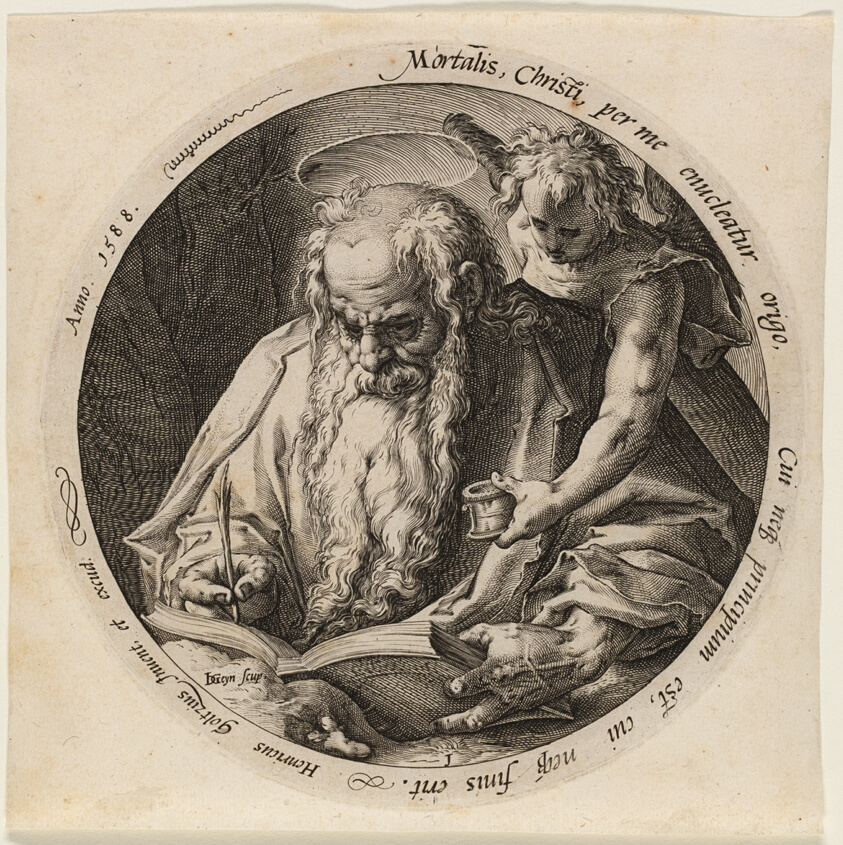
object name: Print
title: Saint Matthew, plate one from The Four Evangelists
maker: Jacob de Gheyn II (Dutch, 1565-1629); after Hendrick Goltzius (Dutch, 1558-1617)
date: 1588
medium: Engraving in black on laid paper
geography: Netherlands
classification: engraving; paper; print; prints and drawing